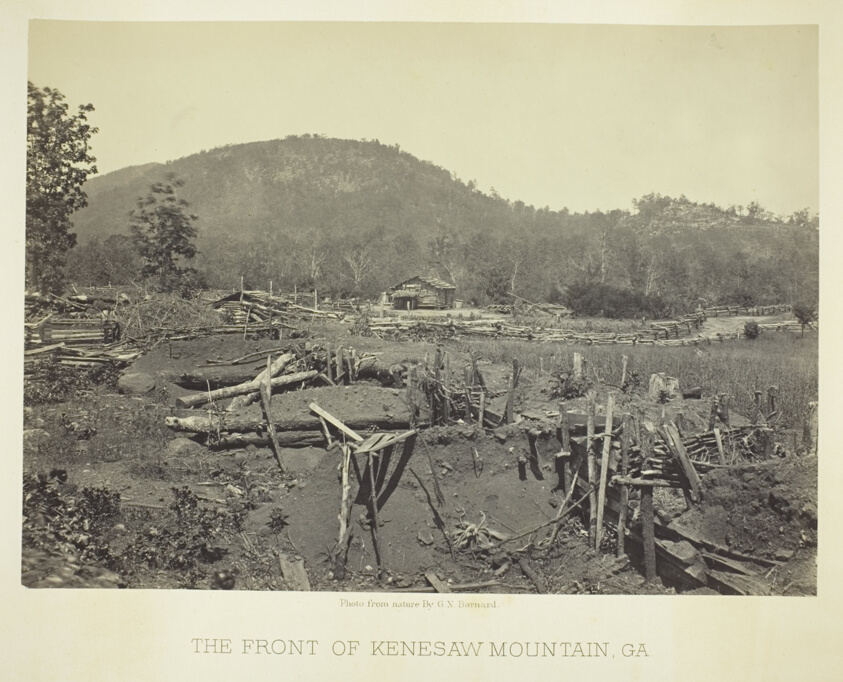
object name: Photograph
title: The Front of Kenesaw Mountain, GA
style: 19th century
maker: George N. Barnard (American, 1819–1902)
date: 1866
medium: Albumen print, plate 31 from the album "Photographic Views of the Sherman Campaign" (1866)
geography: United States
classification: albumen silver print; photographic process; photography; photograph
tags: Collected by Hugh Edwards, Sherman's Campaign 1866